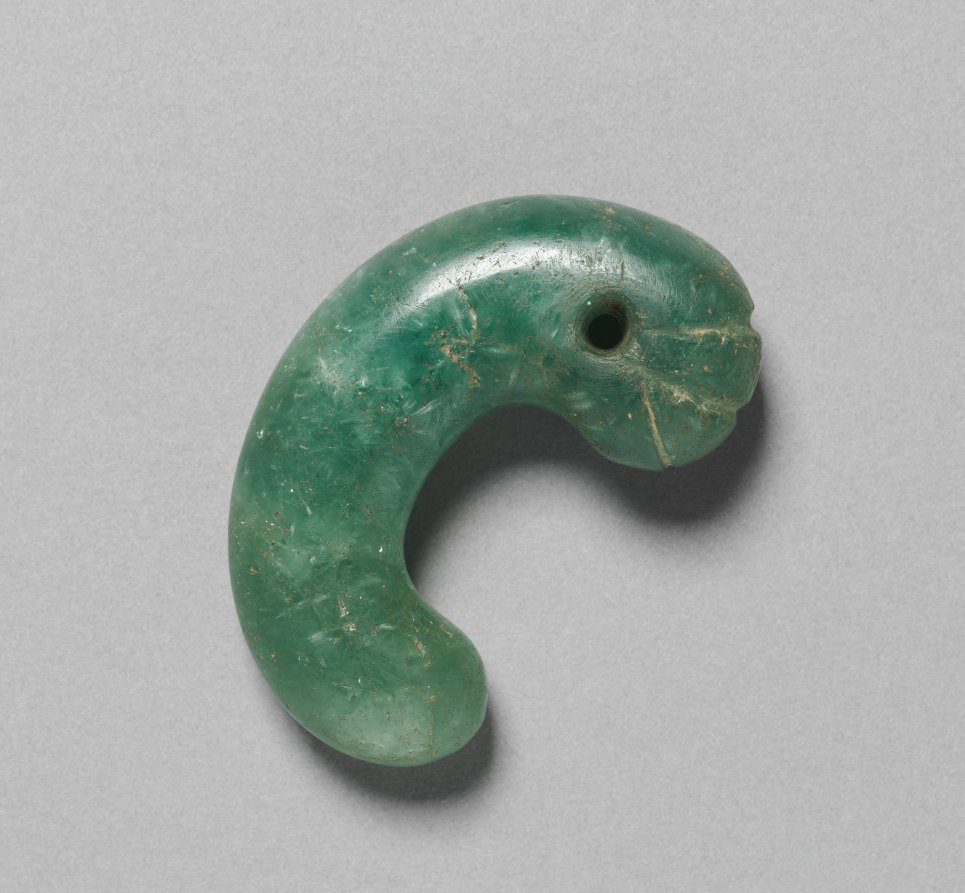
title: Comma-shaped Jade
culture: Korea, Three Kingdoms period (57 BCE–668 CE)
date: 400s CE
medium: jade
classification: Jewelry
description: Jade is one of the hardest stones and requires an intensive, arduous process of abrasion—cutting, chiseling, grinding, and polishing—to achieve the desired shape. A grindstone and a slurry of grit and water shape the jade into the desired form, and then a cloth dampened and rubbed with finer grit may have been used to give the jade the smooth surface. For the Silla kingdom (57 BC–985), in particular, comma-shaped jades served as an essential item for the burials of the ruling class and were luxurious accessories to decorate golden crowns. Their comma shape is thought to represent embryonic forms, symbolizing life, particularly rebirth in the afterlife.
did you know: This unique shaped jade was used as a pendant to decorate necklaces, eyerings, and crowns during the Three Kingdoms period.